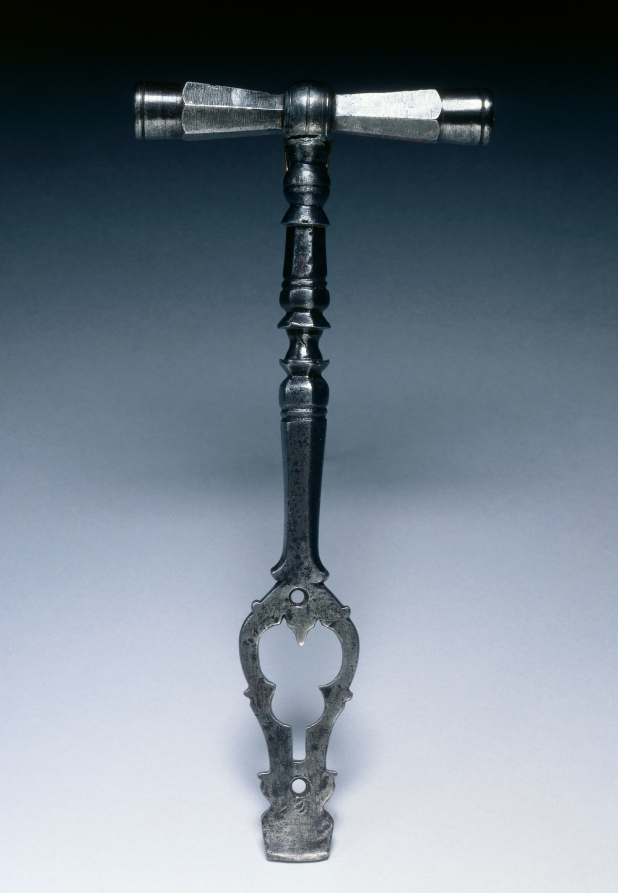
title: Spanner for a Wheel-Lock Gun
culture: Germany, early 17th century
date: c. 1600–1625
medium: steel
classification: Arms and Armor